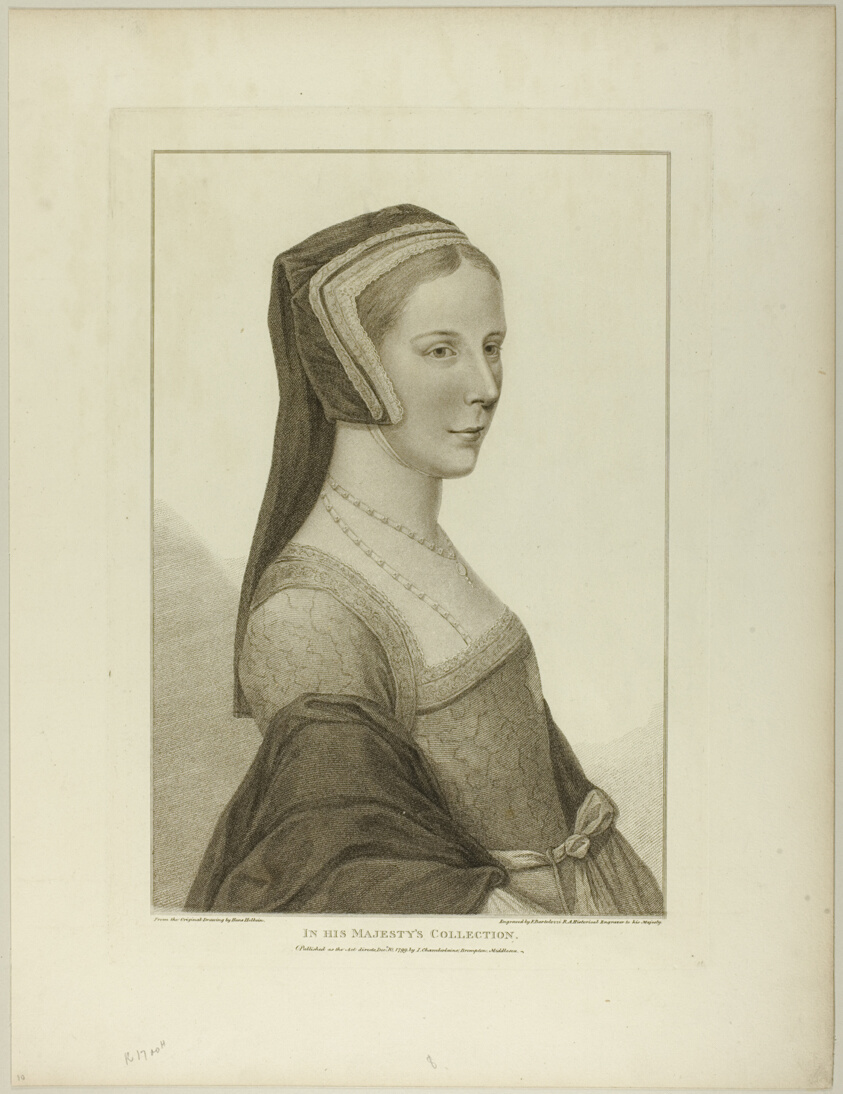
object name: Print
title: Portrait of a Woman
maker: Francesco Bartolozzi (Italian, 1727-1815); after Hans Holbein the younger (German, 1497-1543)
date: December 10, 1799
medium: Stipple engraving on ivory wove paper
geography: Italy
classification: engraving; print; prints and drawing